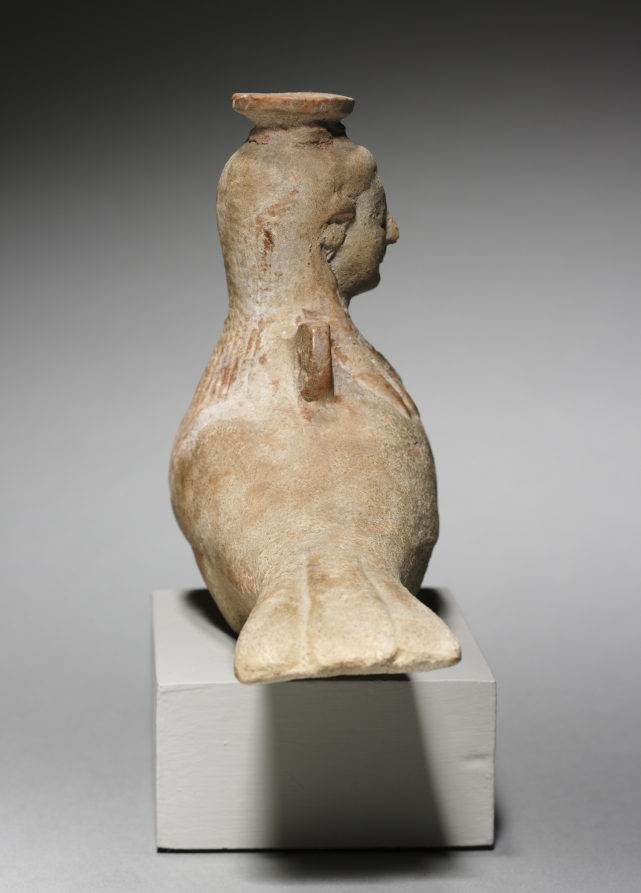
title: Siren-Shaped Perfume Flask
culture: Greece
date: 600–480 BCE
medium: terracotta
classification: Sculpture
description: A half-bird, half-woman creature, a siren lured sailors to death by the sweetness of her song. The most famous sirens appear in the ancient epic the Odyssey. Shaped like a siren, this vessel likely held valuable perfumed oil. Its small mouth limited spillage, and a string attached to the loops on its back allowed it to hand or hold a stopper.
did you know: In the Odyssey, Odysseus’s crew escapes the sirens by plugging their ears with wax.